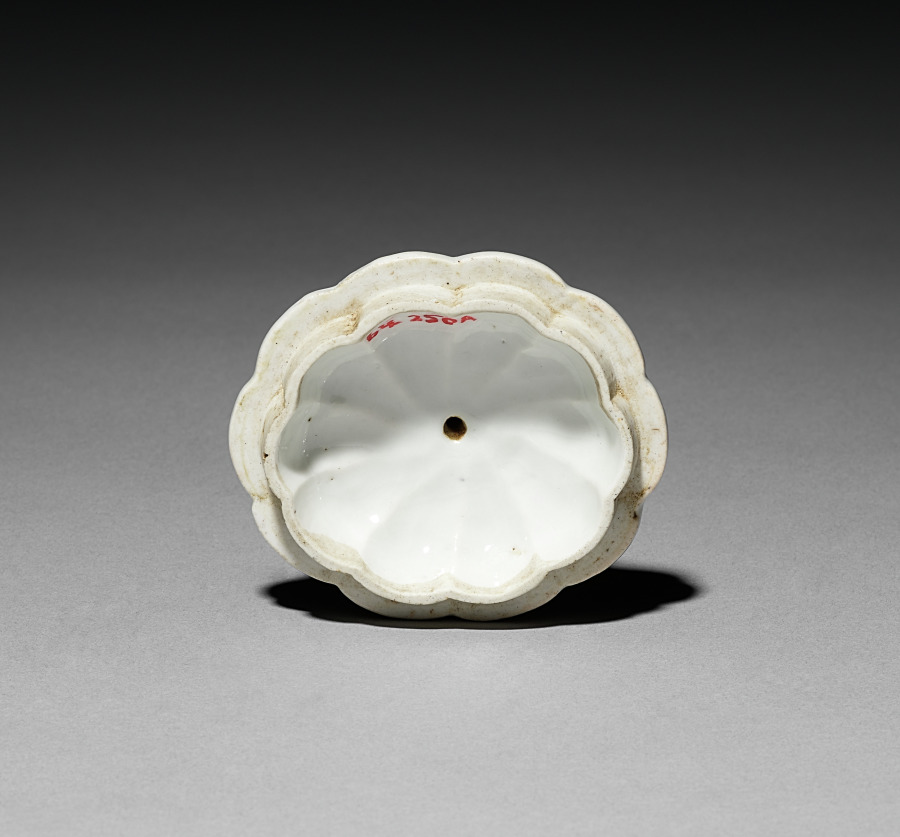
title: Teapot with Birds and Flowers (lid)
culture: Japan, Edo period (1615–1868)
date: 1700s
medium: Porcelain with overglaze color enamel (Arita ware)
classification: Ceramic